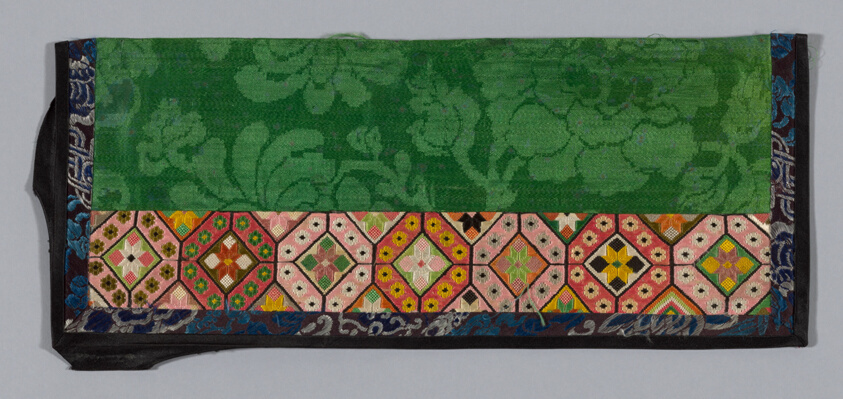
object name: Costume and Accessories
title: Trouser Band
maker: Han-Chinese (China)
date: Qing dynasty (1644–1911), 1875/1900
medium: Forty-four pairs and eight odd pieces of embroidered sleeve, ankle bands, etc. on gauze.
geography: China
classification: costume - embroidery; embroidery; costume